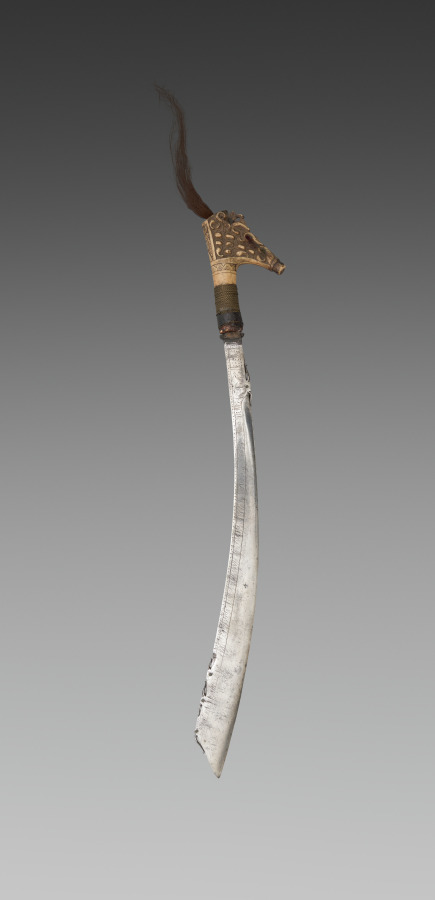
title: Knife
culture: Philippines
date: before 1916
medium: metal, wood, bone, and hair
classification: Arms and Armor